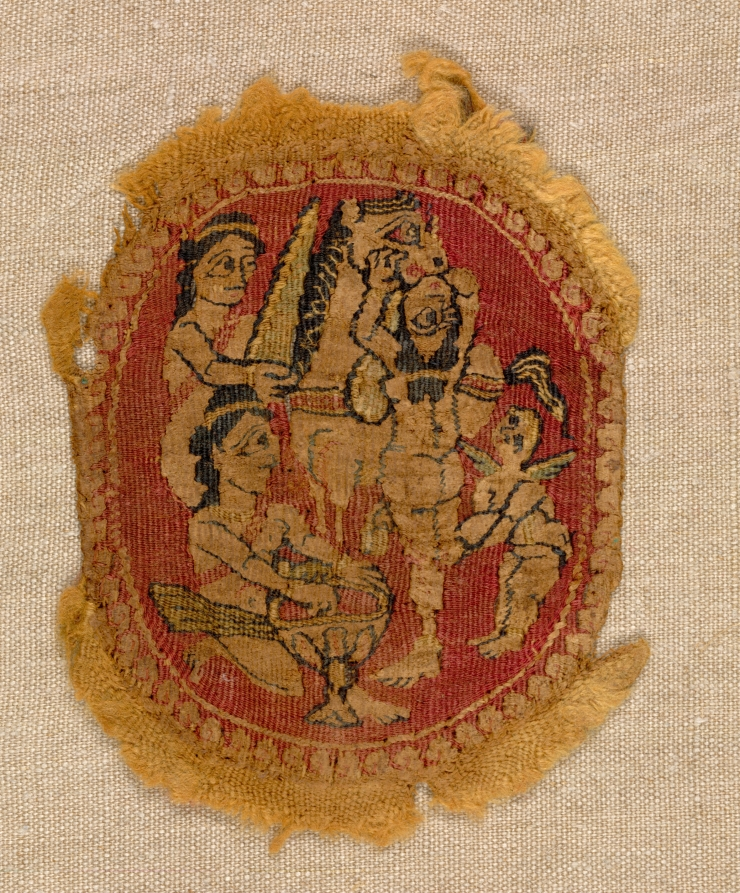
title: Five Round Segmenta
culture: Egypt, Umayyad period (661–750)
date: 650 – 750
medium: tapestry weave: wool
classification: Textile